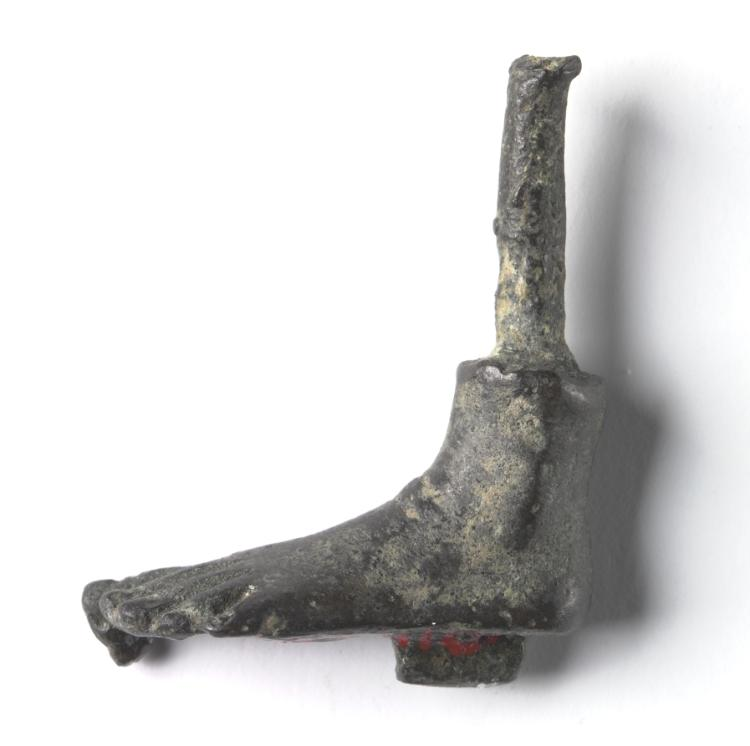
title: Bronze Mount from a "Shawabty Bundle": Arm with Feather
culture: Egypt, Thebes, Wadi Qubbanet el-Qirud, New Kingdom (1540–1069 BCE), Dynasties 18–19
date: c. 1336–1256 BCE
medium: bronze with traces of gilding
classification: Funerary Equipment